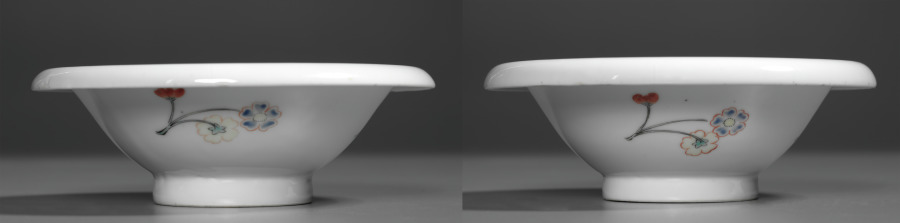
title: Bowls with Floral Sprays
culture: Japan, Edo period (1615–1868)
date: early 1700s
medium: two of a set of bowls; porcelain with overglaze color enamel (Hizen ware, Kakiemon type)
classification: Ceramic